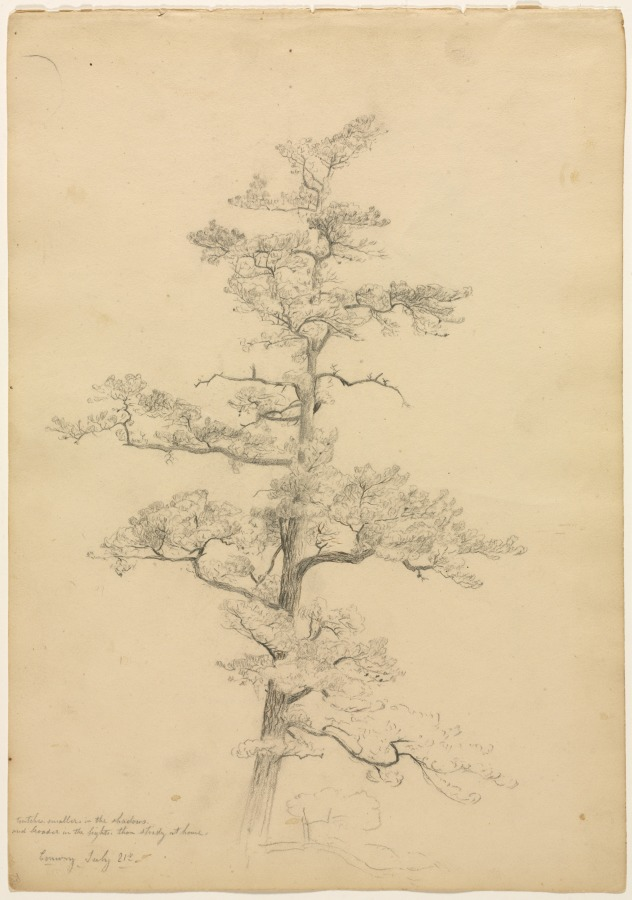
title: Pine Tree, Conway, New Hampshire (recto); Landscape and Tree Studies (verso)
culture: America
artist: David Johnson (American, 1827–1908)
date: c. 1851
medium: graphite with pen and brown ink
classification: Drawing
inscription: recto: by artist, in graphite, ll: toutches. [sic] smaller in the shadows. / and broader in the lights. than study at home. / Conway July 21s [fragmentally underlined] verso: by artist, in graphite, across bottom: shadow. brown, middle tient, brown green. lights yellow. with white for the high lights. [partially underlined] ; by unkown hand, lower right, in graphite: 1500 ; by different unknown hand, lower right, in graphite: 120 [partially erased)